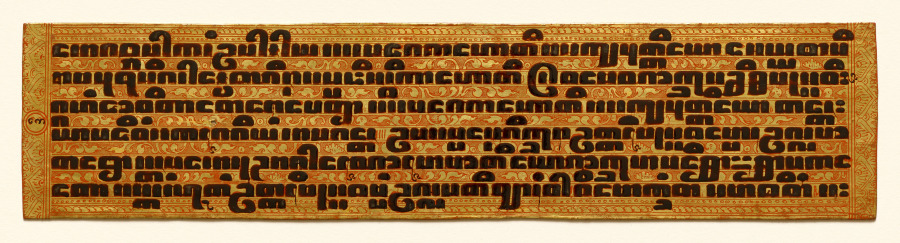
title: Text, folio 7 (verso) from a Kammavacha: Buddhist ordination text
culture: Myanmar (Burma)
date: 1800s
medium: Leaf: lacquer and gilding on cloth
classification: Manuscript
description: In premodern Burma, lay people commissioned lavishly ornamented manuscripts for ceremonial occasions, when officiants would read aloud from the text. Written in black lacquer, the text is in the language of Pali written in a Burmese script. It contains ordination rites and procedures for monastic ceremonies. The second to last page is covered with intricately drawn, winged celestial beings (nats) in gestures of praise. They fly amid intertwining vegetation—denoting bounty—that grows from serpentine forms that refer to rain clouds. Lionlike forms inhabit the space with them. The top and bottom covers are equally ornamented with jeweled floral patterning.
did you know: The Pali text of this manuscript is written in Burmese square script, which is also known as "tamarind seed script."